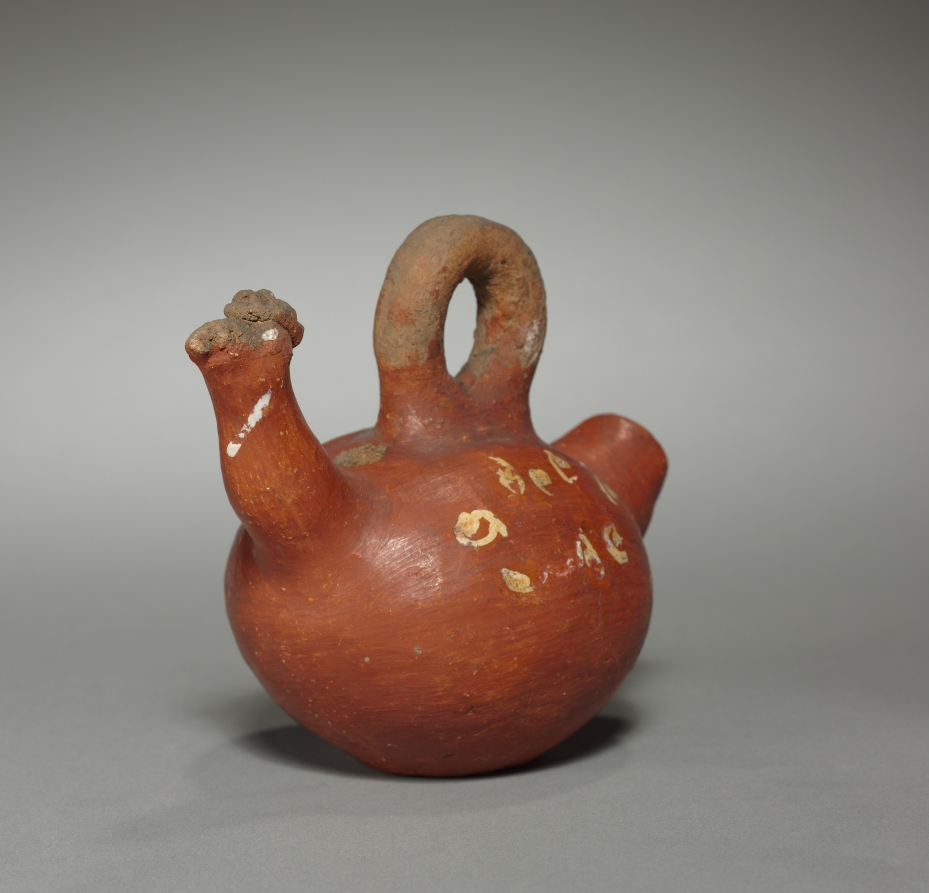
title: Bottle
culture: Peru, 20th century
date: 1900–1920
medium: pottery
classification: Ceramic